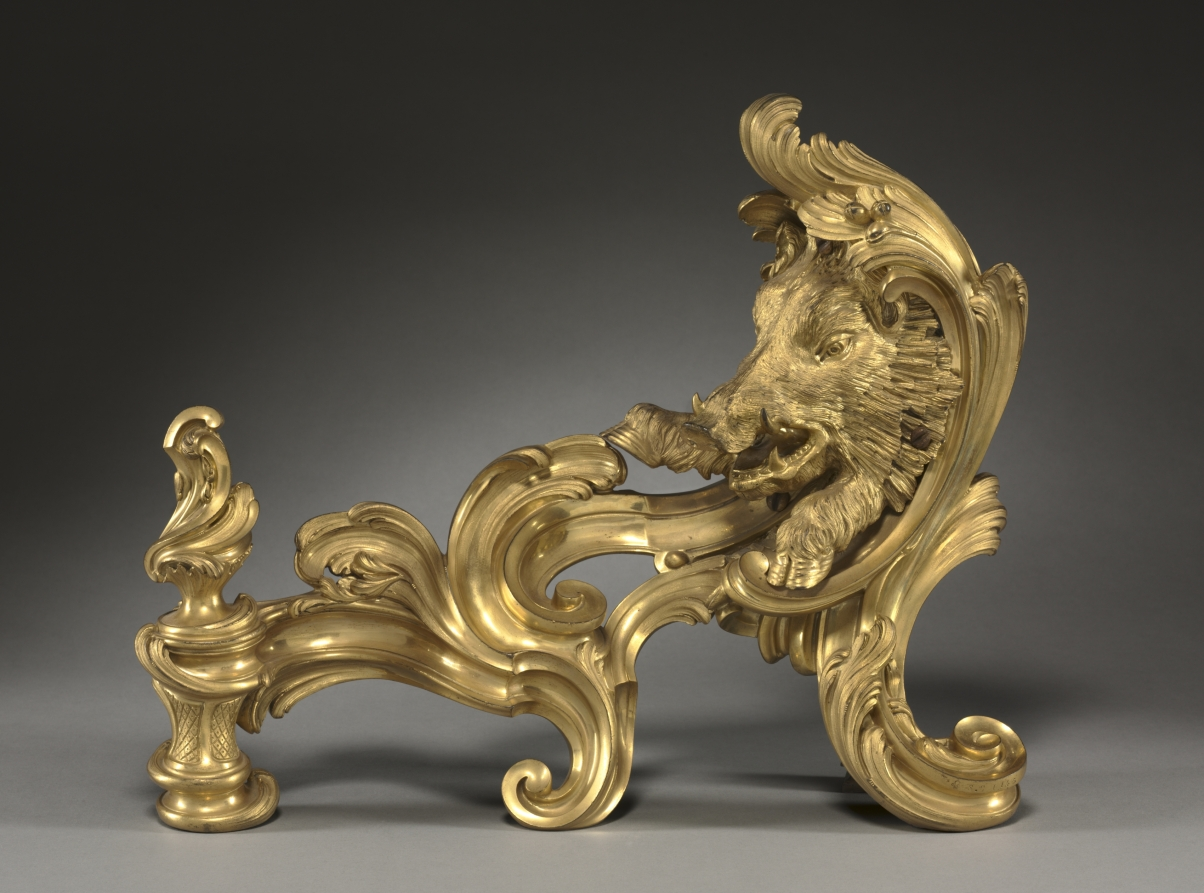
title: Firedog (2 of 2)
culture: France, 18th century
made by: Jacques Caffieri (French, 1678–1755)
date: 1752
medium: gilt bronze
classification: Furniture and woodwork